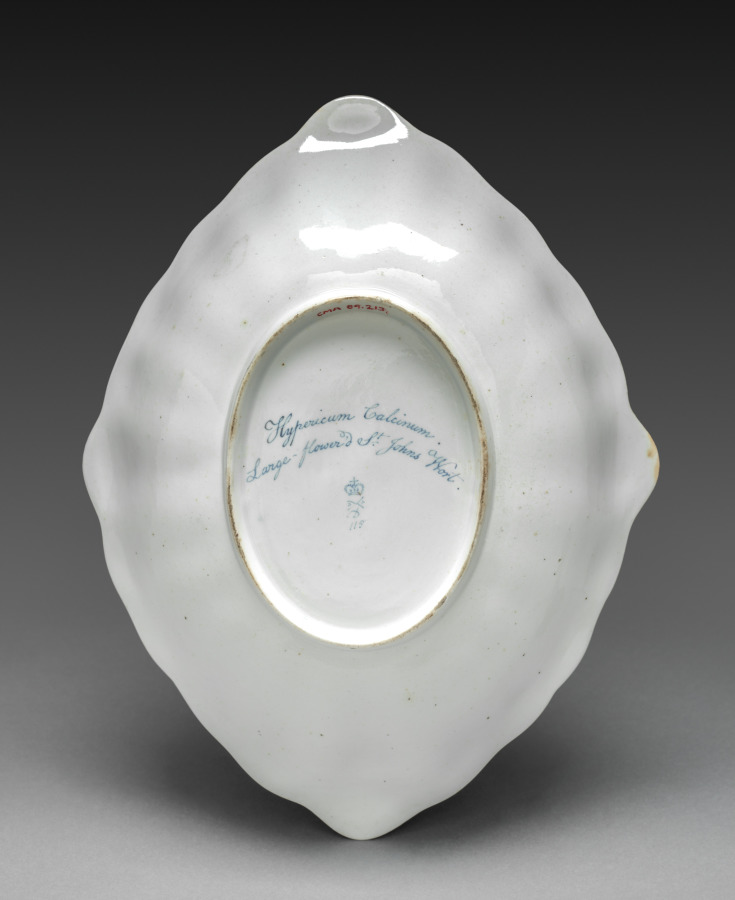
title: Lozenge Shaped Dish from Dessert Service: Large Flowered St. John's Wort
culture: England, Derby, 18th century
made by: Derby (Crown Derby Period) (British)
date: c. 1800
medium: porcelain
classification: Ceramic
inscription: inscribed in blue on back: Hypericum Colcinum./Large-flowerd St. John's Wort./crown/crossed batons and dots/D/115. Near edge: 9.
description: Each dish is decorated with recognizable plants, the names of which are inscribed on the base in both Latin and English. Identifying the blossoms only became customary in the late 18th century when a single piece of porcelain was decorated with one species, and flowers were represented along with leaves, stems, seed pods, and roots. All of this reflects Carolus Linnaeus’s recent invention of a scientific method to categorize all known flora. The decorations on the Derby factory’s products derive from contemporary English botanical publications. For instance, illustrations in William Curtis’s The Botanical Magazine served as models for the French marigold and nettle-leaved bell flower on the dessert service.